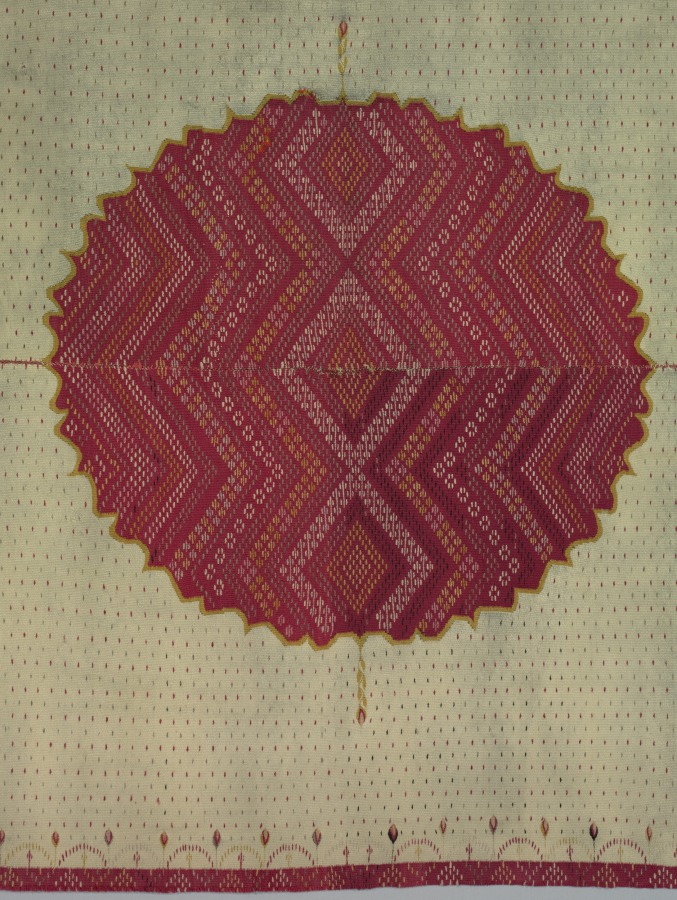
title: Sarape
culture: America, Native North American, Southwest, Mexico, Saltillo, Post-Contact, Late Classic Period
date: c. 1865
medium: tapestry weave: cotton and wool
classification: Textile